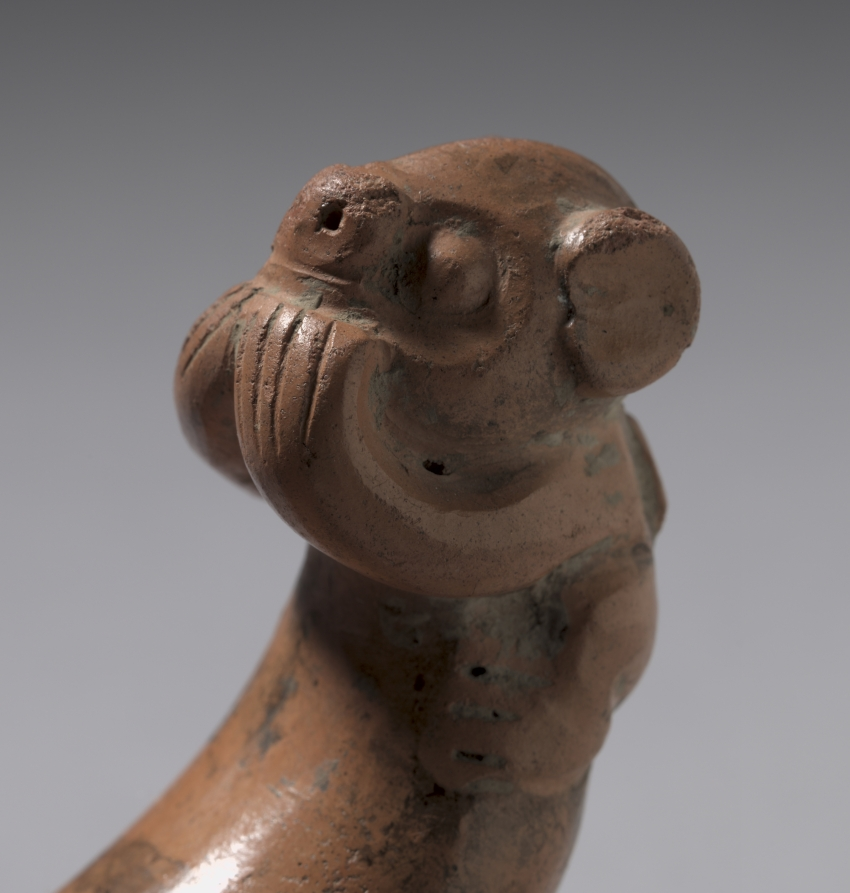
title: Dipper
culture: Peru, North Highlands, Recuay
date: 100 BCE–700 CE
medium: ceramic, slip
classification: Ceramic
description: Both of these objects feature a creature known as the "Recuay feline," although it could also refer to a fox, dog, or viscacha (a rodent). Whatever its identity, the prominent crest on its head ties it to the supernatural realm, a connection underlined by the deity head that also appears on the dipper and by the ritual function of snuff tablets, which were used to inhale hallucinogenic snuffs during religious ceremonies.